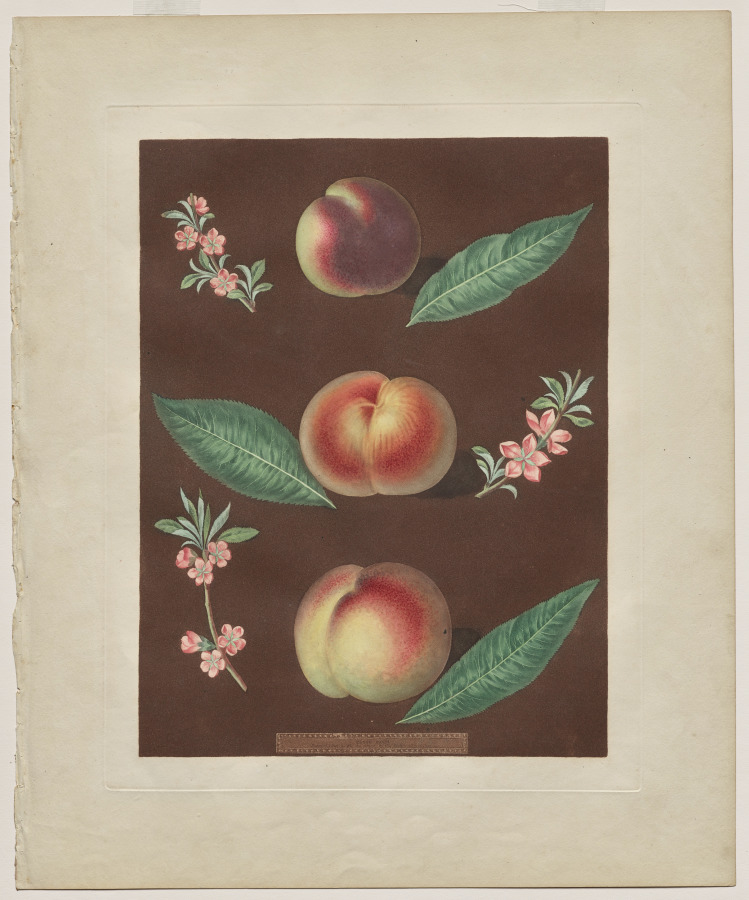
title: Pomona Britannica: No. 33 - Peaches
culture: England, 19th century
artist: George Brookshaw (British, 1751–1823)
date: 1805, published 1812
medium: aquatint and stipple engraving printed in color and hand colored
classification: Print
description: This color aquatint etching is one plate from George Brookshaw’s 1812 illustrated volume Pomona Britannica. Named after the Roman goddess of fruit trees, gardens, and orchards, Brookshaw intended the volume to be the English “country gentleman’s” guide to the science of classifying and identifying fruits (pomology). Many of Brookshaw’s models came from the Royal Gardens at Hampton Court and Kensington Gardens. Each print featured one fruit, often life-size, including detailed depictions of its flower and leaves. Printed in color with hand-painted highlights, this and other illustrated botanicals formed an essential part of the cultured English library in the early 19th century.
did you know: Peaches were not introduced to England until the 17th century, apparently from its North American colonies.